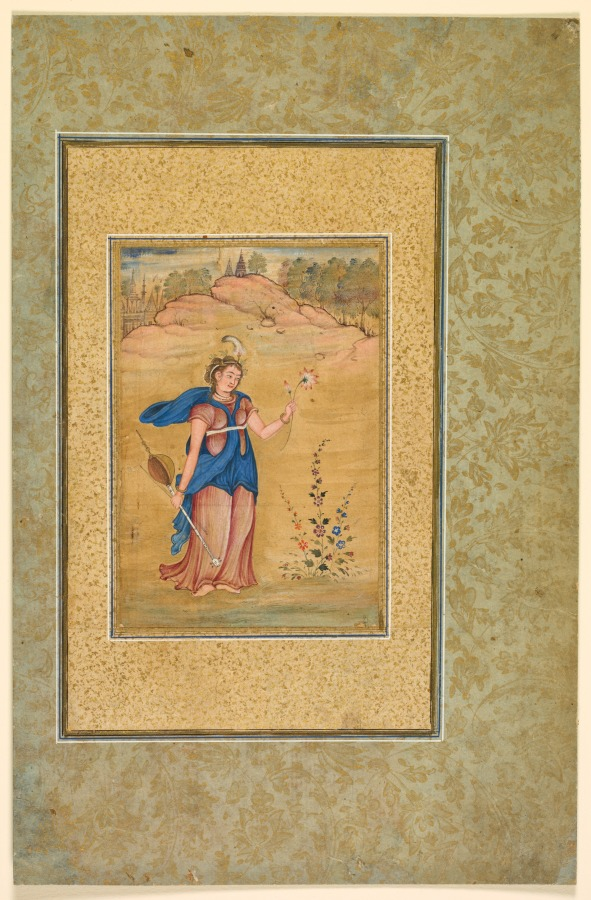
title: A female figure standing in a landscape holding a four-stringed “khuuchir” and a lotus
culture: Mughal India, court of Akbar (reigned 1556–1605)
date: c. 1590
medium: Gum tempera and gold on paper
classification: Painting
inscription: [verso, upper left, sticker] 1027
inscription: [verso, right of sticker, in pencil] 24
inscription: [verso, upper center, in pencil, upside down] VI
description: Standing over flowering sprigs, holding a lotus like a scepter, the figure seems to magically impart fertility to a desert. In pan-Indian religious iconography (system of visual symbols that identify a figure), the lotus is held by the goddess of good fortune, prosperity, and abundance, who is frequently associated with ideal kingship. The stringed instrument recalls the Indian goddess of learning and music, but here it is of a Mongolian type, as is the feather in her crown. Her garments are reminiscent of those worn by biblical and classical figures in European engravings. This painting combines Indian, European, and Mongolian references.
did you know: The four strings of the woman’s khuuchir would have been made from silk.